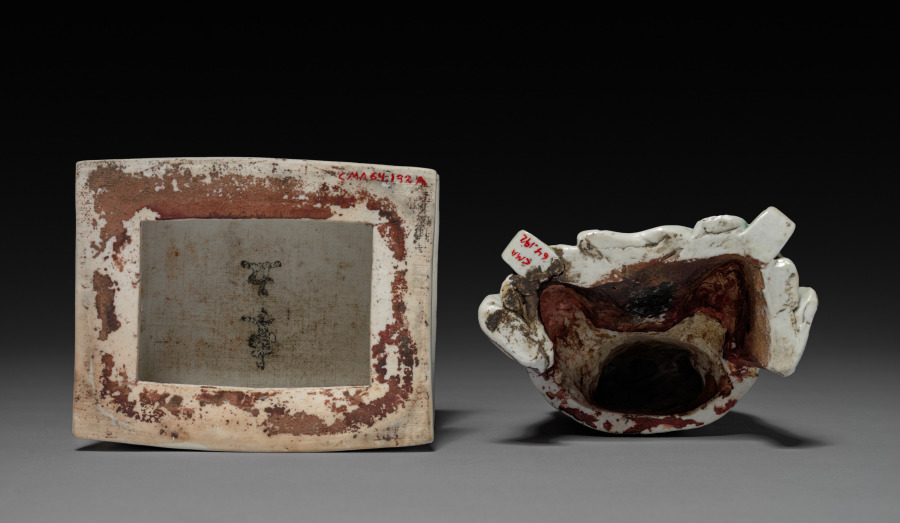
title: Lohan (Arhat) Holding a Fu Dog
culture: China, Jiangxi province, Jingdezhen kilns, Qing dynasty (1644-1911), Kangxi reign (1662-1722)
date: 1662–1722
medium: porcelain with famille verte overglaze enamel decoration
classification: Ceramic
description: Lohan are disciples of Buddha with supernatural powers and eccentric behaviors. This lohan is holding the fu-dog, symbolizing good luck, while its mate is holding the peach of longevity (shoutao). With carefree smiles and playful gestures, these two figures embody a humorous attitude and a detachment from worldly affairs. This pair of porcelain figures was perhaps part of a house altar set or a decorative item in a household.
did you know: This lohan and its pair embody a humorous attitude and playful behavior, indifference to danger and miracles, and hence a detachment from worldly affairs.